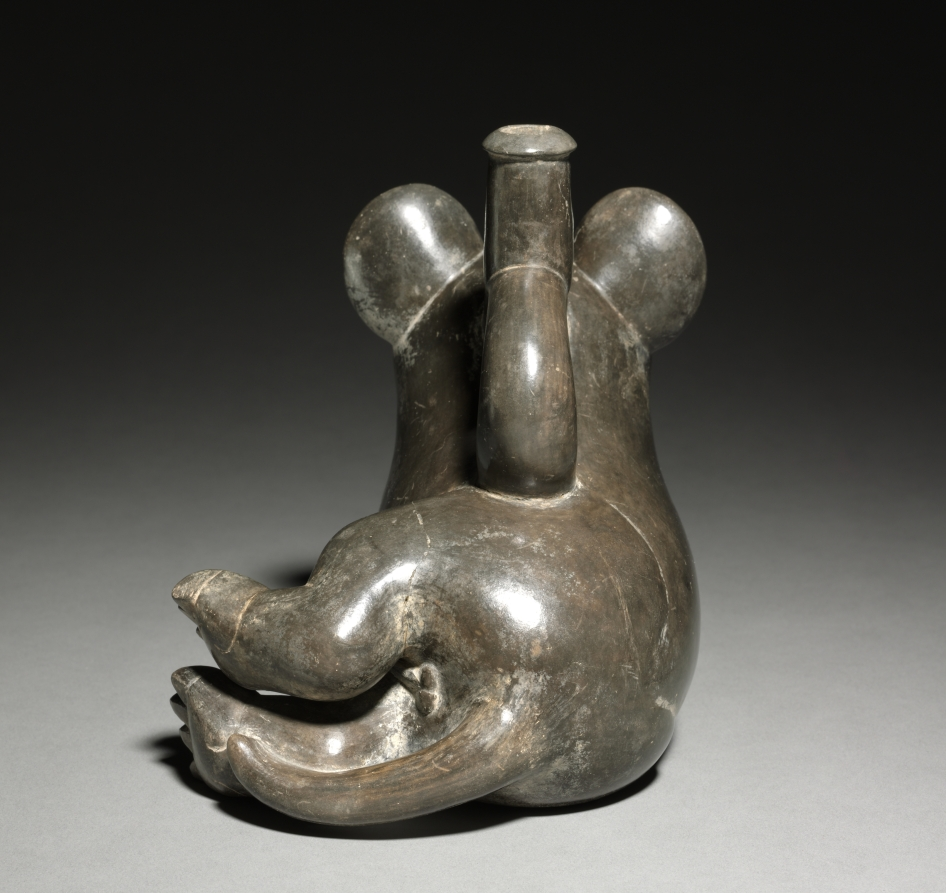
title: Feline Vessel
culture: Central Andes, North Coast, Moche people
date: 200–850 CE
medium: ceramic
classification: Ceramic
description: This darkware vessel is early Moche and demonstrates the transition from earlier North Coast cultures, which used smudge firing and post-fire pigmentation, to Moche times, which saw the adoption of new, higher-oxygen firing technologies and the use of slips applied before firing.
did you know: The Moche were known for their fine animal representations.